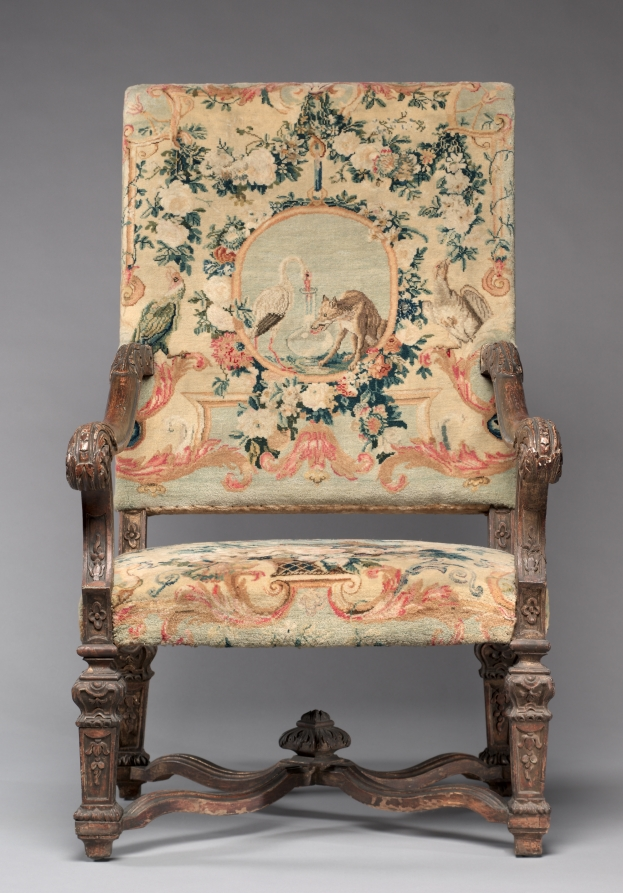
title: Armchair (4 of 4)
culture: France, 18th century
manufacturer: Royal Savonnerie Manufactory, Chaillot Workshops (French, est. 1627)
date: before 1717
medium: carved wood, Savonnerie knotted-pile (symmertrical rug knot) upholstery; wool, hemp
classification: Furniture and woodwork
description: These chairs belong to a suite that includes a settee (also in the CMA’s collection) and a tapestry made for a count and countess to mark their wedding in 1717. Furniture of this scale was usually placed against the wall in grand reception halls, more as a display of wealth than for use. Upholstered in Savonnerie tapestries, this suite was among the most treasured and expensive example anyone could own and typically reserved for royalty. To add decorative and intellectual interest to the textiles, weavers incorporated symbols depicting various stories from the Fables of Jean de La Fontaine, published from 1668 to 1694 and largely adapted from Aesop and other early storytellers.